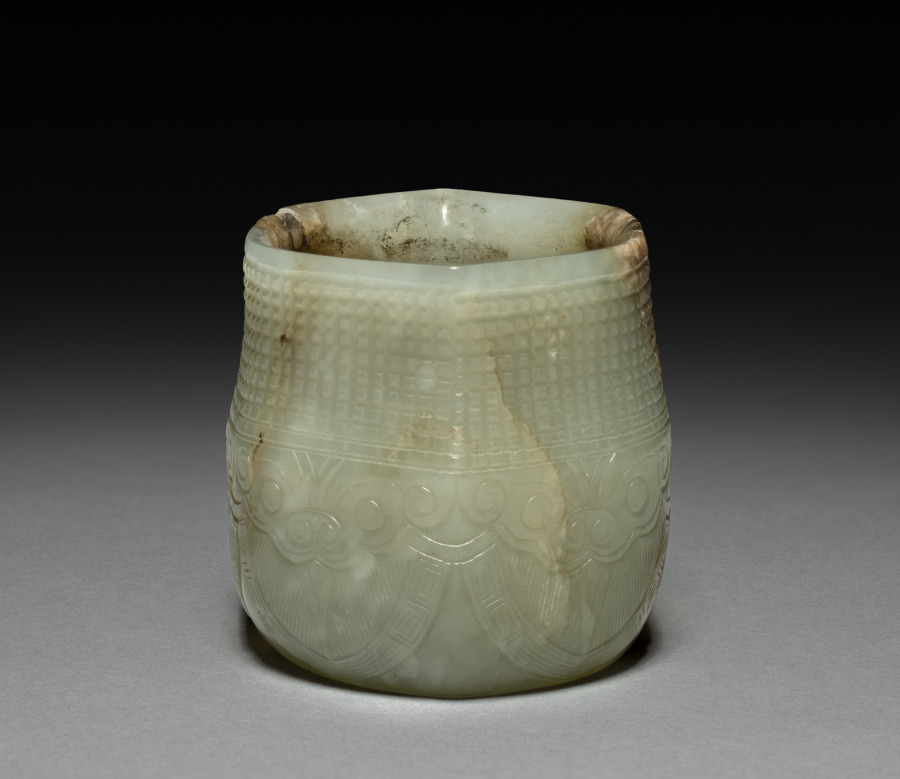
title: Cup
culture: China, Song dynasty (960-1279)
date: 960– 1279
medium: jade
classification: Jade